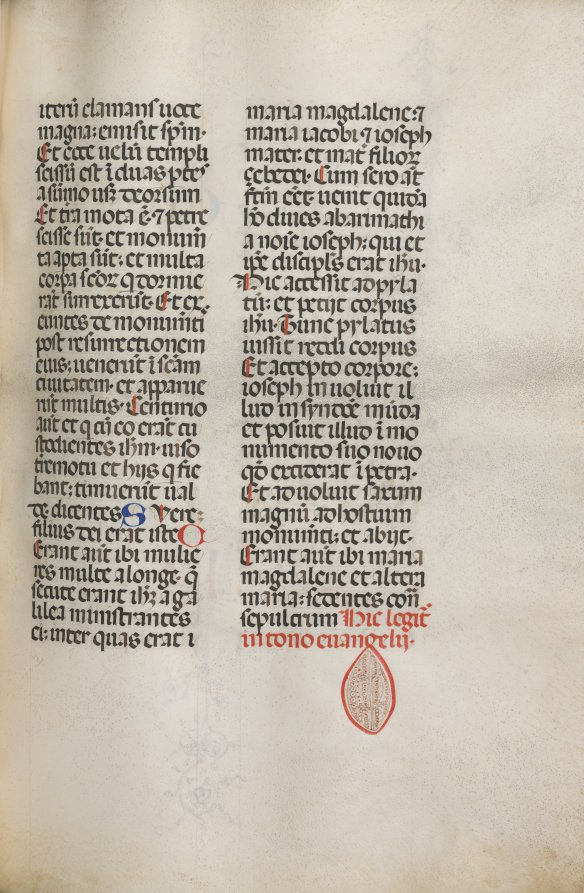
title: Missale: Fol. 122: contains music for "Hely Hely Lama etc." within St. Mattion Passion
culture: Italy, Perugia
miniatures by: Bartolommeo Caporali (Italian, c. 1420–1503)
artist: assisted by Giapeco Caporali (Italian, d. 1478)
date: 1469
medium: ink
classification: Bound Volume